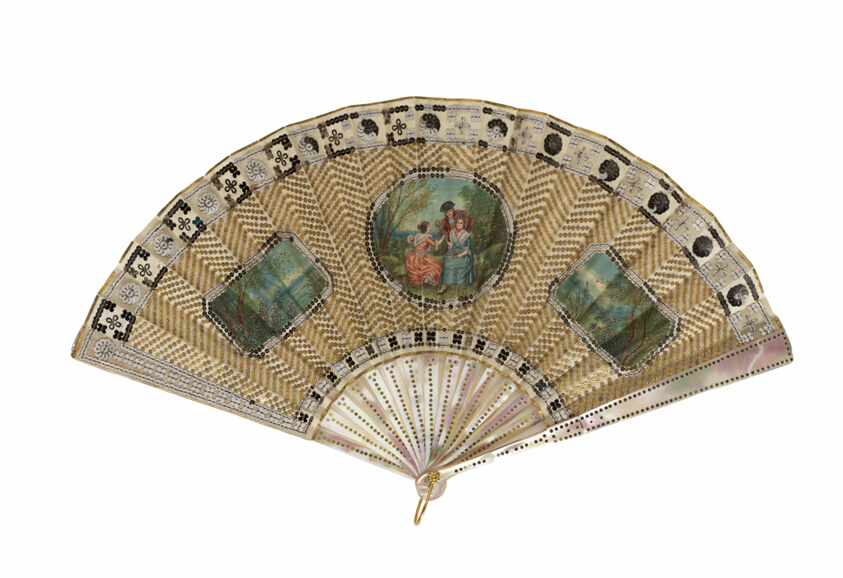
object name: Costume and Accessories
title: Fan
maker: France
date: 19th century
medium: Mother of pearl (?), ribs, slips, and guardsticks; painted; silk, plain weave; painted; appliquéd with gilt- and silvered-metal spangles; gold leaf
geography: France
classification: textile; fan - weaving; costume accessory - folding fan; costume accessory; costume